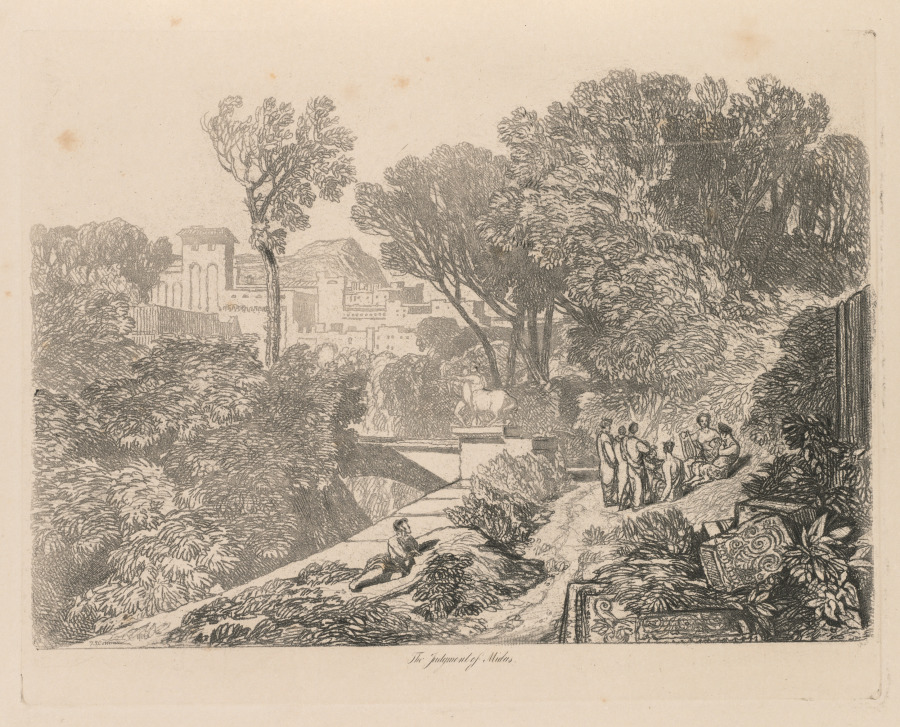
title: Liber Studiorum: Plate 6, The Judgment of Midas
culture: England, 19th century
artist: John Sell Cotman (British, 1782–1842)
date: 1838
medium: softground etching, from a bound volume containing 48 plates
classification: Bound Volume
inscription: In plate, within image, upper right: 6; in plate, within image, J S. Cotman; in plate, below image: The Judgment of Midas